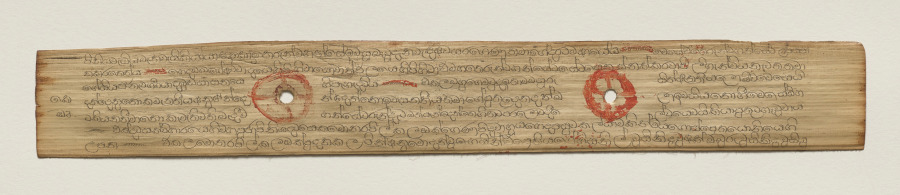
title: Leaf from a Buddhist Manuscript (recto)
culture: Sri Lanka, Singhalese, Late 17th century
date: c. 1700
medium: fiber paper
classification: Manuscript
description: Palm leaf material is still used for manuscripts in Sri Lanka. The palm leaves are prepared first by boiling them, drying them in the sun, and then rubbing them with oils. Scribes then use a metal stylus to incise the text. Then charcoal powder is wiped across the pages, filling in only the inscribed lines.